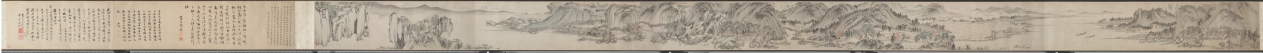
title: Mt. Taibo in the Style of Wang Meng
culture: China, Ming dynasty (1368–1644)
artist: Du Qiong (Chinese, 1396–1474)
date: 1442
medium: handscroll; ink and light color on paper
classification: Painting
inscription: Artist's inscription, signature, and 11 seals: [1 seal] Tung-yüan chai. Huang-ho-shan-ch'iao [Wang Meng] painted a painted called T'ai-po Mountain. Its brushwork is superior and admirable, which is very close to Yu-ch'en [Wang Wei, 699-759]. The cleverness of its composition, the maple groves and rustic temples, the inaccessible ravines and autumnal plateaus, the periolous peaks and strange rocks, etc., all seem to be so natural. The paper is only a little over eight feet, but the landscape has the range of a thousand miles. Once you open and note the contents, it is as if one were roaming among the mountain peaks enveloped in mist and clouds, and forgot the dusty world. When I first saw this, I was so mixed with excitement and joy that I could not take my hands off the painting. So I put it on the table, and tried my best to imitate it, forgetting sleeping and eating for about three months before it was completed. Although I do not dare to tread in the footsteps of Huang-ho shan ch'iao, I took great pains to capture his spirit in composition and colors. I do not know whether it would pass the judgment of the experts. On the fifteenth day of the fifth month, the seventh year of the Cheng-t'ung year [1442], inscribed by Tung-yüan, Tu Chiung. [2 seals] Yung-chia; Ching-chieh ming-men. [8 seals on painting] Tung-yüan chai; Ching-chieh ming-men; Yung-chia; Tu Ch'iung yin; Tung-yüan (repeated 5 times). trans. WKH/LYSL 3 colophons and 7 additional seals: 1 colophon and 2 seals of Chou Ting (1401-1487); 1 colophon and 2 seals of Wu K'uan (1435-1504); 1 colophon, dated 1655, and 2 seals of Lan Ying (1585-after 1664).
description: When a Chinese painter "imitated" a painting by a past master, the intention was never to produce an exact copy. Du Qiong, the Ming painter from Suzhou, is a case in point. The painting style of this handscroll is actually closer to that of Huang Gongwang (1269–1354) than to the style of Wang Meng (about 1301–1385). Both masters were active during the previous dynasty and are among the so-called Four Great Masters of the Yuan dynasty (1279–1368). In this painting, the interplay of styles, including Du Qiong's own, contribute to an inner dimension that is more than visual. Mt. Taibo is located in the province of Zhejiang and is known for its scenic beauty. In this scroll, however, it is not depicted literally. The image is an ideal representation of mountains in southeastern China.